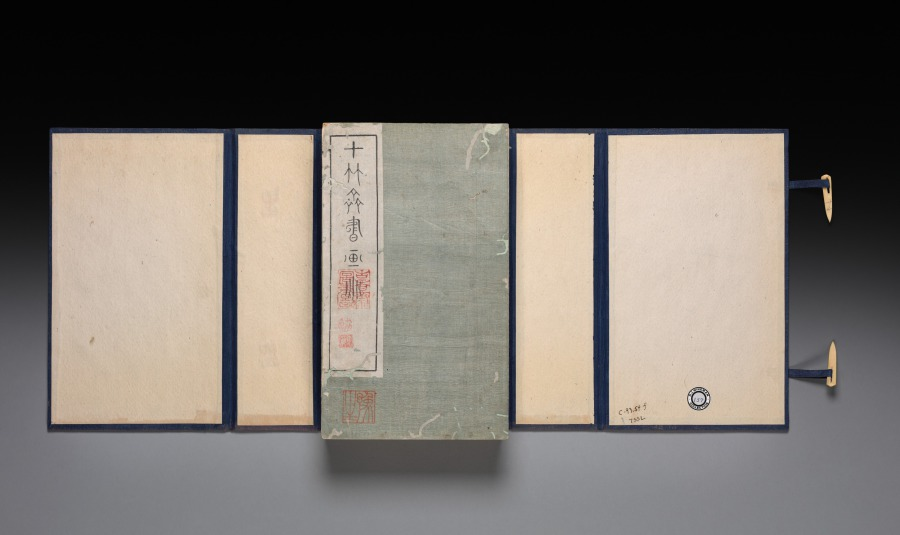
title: Ten Bamboo Studio Painting and Calligraphy Handbook (Shizhuzhai shuhua pu): Volume One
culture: China, Qing dynasty (1644-1911)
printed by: Hu Zhengyan (Chinese, c. 1584–1674)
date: 1633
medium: Woodblock-printed book; ink and colors on paper; first edition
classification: Print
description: Color printing reached a level of perfection in the early 1600s, as seen in this Ten Bamboo Studio Collection of Calligraphy and Painting and the Mustard Seed Garden Manual of Painting (printed 1679 and 1701). The painterly quality, precision in registering (aligning) the woodblocks, and harmonious colors made them the most successful color print editions in Chinese history. Both editions were printed and compiled in Nanjing, spread nationwide, and had a great impact on the arts in Japan and Korea.